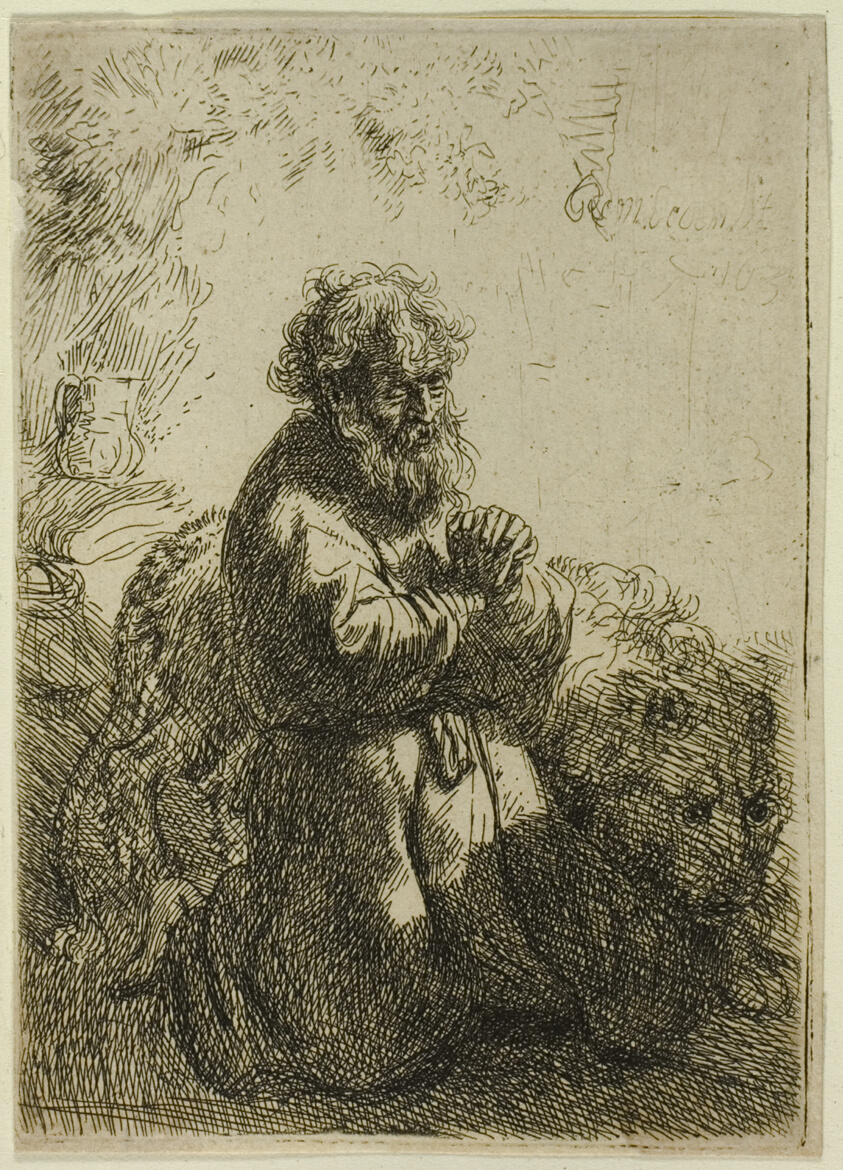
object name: Print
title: St. Jerome Kneeling in Prayer, Looking Down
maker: Rembrandt van Rijn (Dutch, 1606-1669)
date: 1635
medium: Etching on paper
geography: Holland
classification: etching; print; prints and drawing; paper